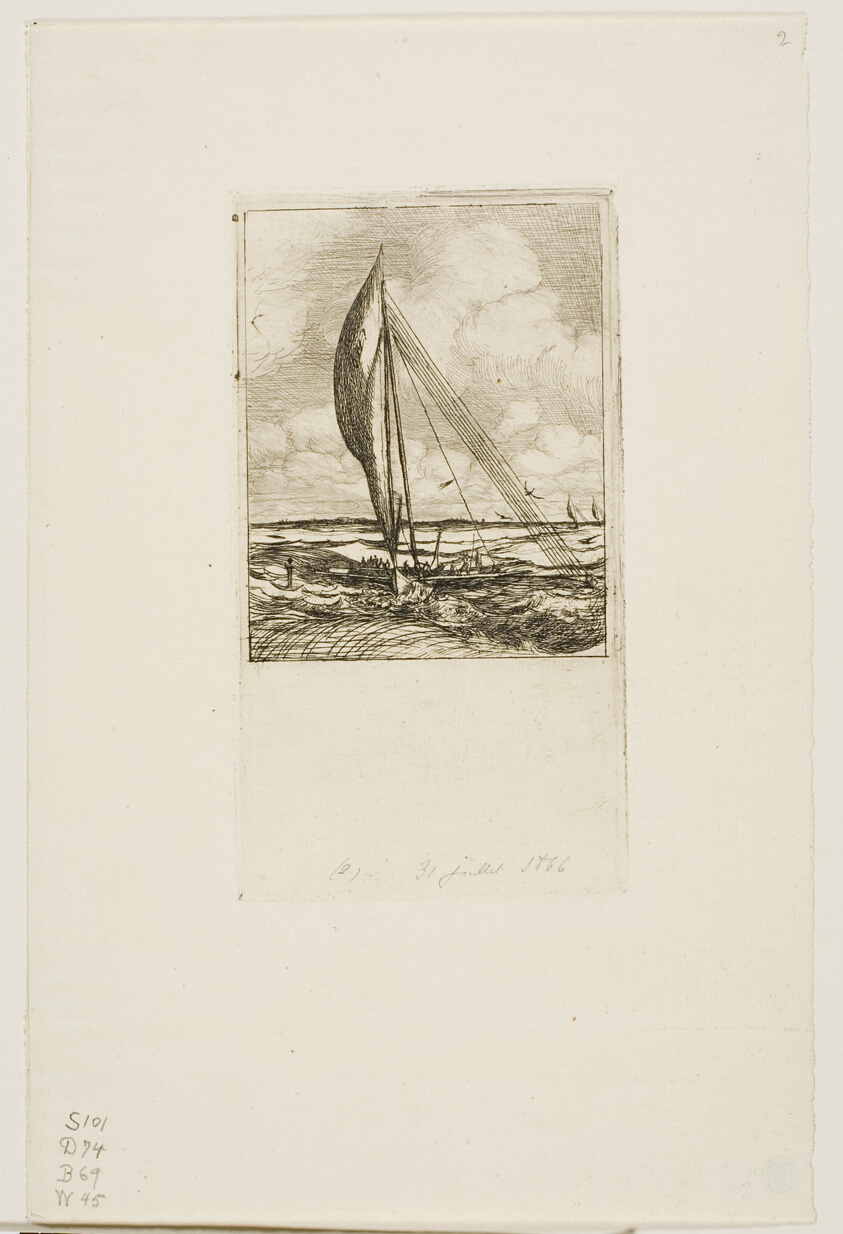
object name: Print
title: Swift-Sailing Proa, Mulgrave Archipelago, Oceania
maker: Charles Meryon (French, 1821-1868)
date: 1866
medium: Etching and drypoint on ivory laid paper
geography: France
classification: etching; print; prints and drawing